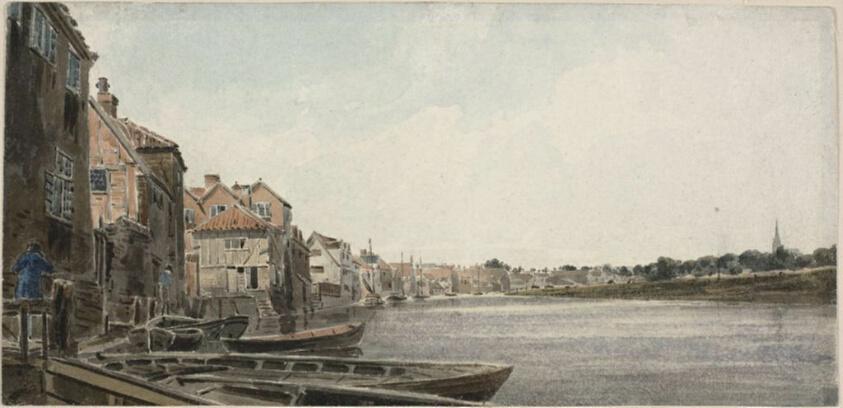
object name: Drawing and Watercolor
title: View on the Wensum at King Street, Taken from Foundary Bridge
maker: John Thirtle (English, 1777-1839)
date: 1810/18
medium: Watercolor on off-white wove paper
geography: England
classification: watercolor; drawings (visual works); prints and drawing